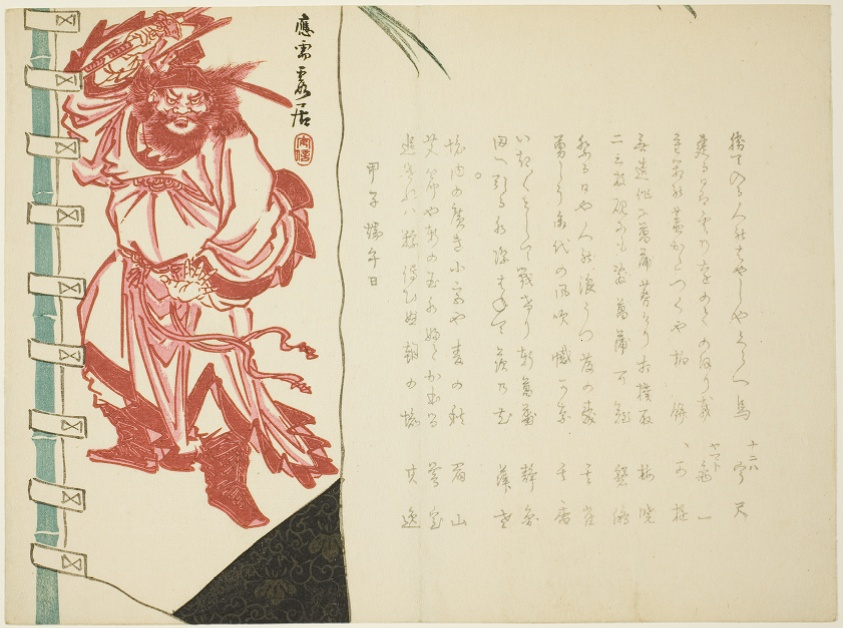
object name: Print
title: Shoki Banner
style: Japanese (culture or style)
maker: Matsukawa Hanzan (Japanese, c. 1820-1882)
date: 1864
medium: Color woodblock print; surimono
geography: Japan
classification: woodblock print; print; asian art